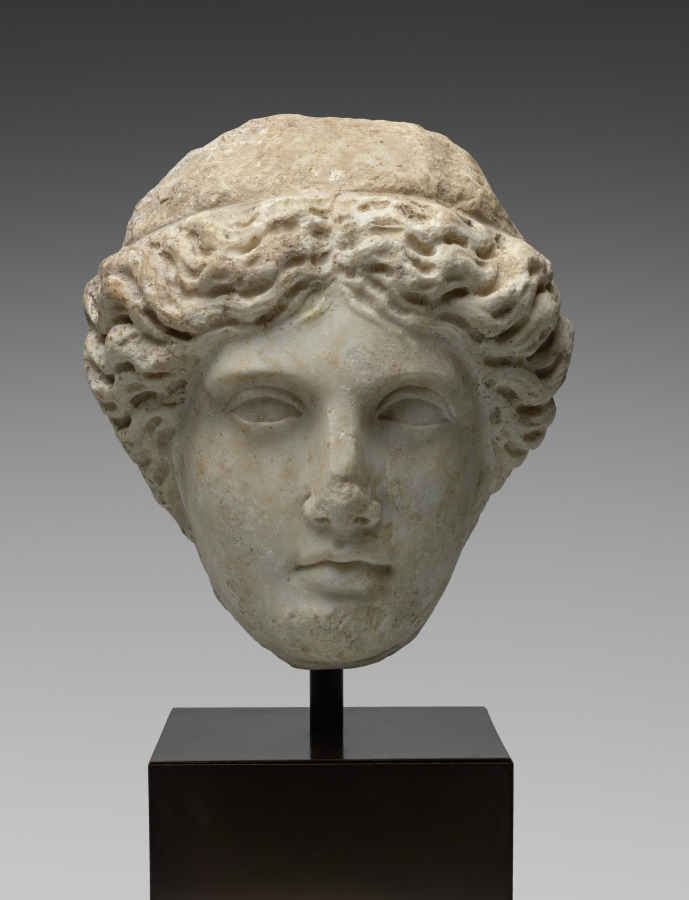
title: Head of Apollo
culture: Roman, Imperial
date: 1–200 CE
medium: marble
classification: Sculpture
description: This marble head, about three-quarter life-sized with idealized features, likely represents Apollo, the god most renowned for his youthful beauty. The hair spreads from a central part, flowing to either side in long and deeply drilled locks that cover the ears. An incised line separates these locks from a rougher area above, probably reserved for a separately made diadem or wreath, likely of metal.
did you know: This head of Apollo has also been identified as female, perhaps a Muse or other goddess.